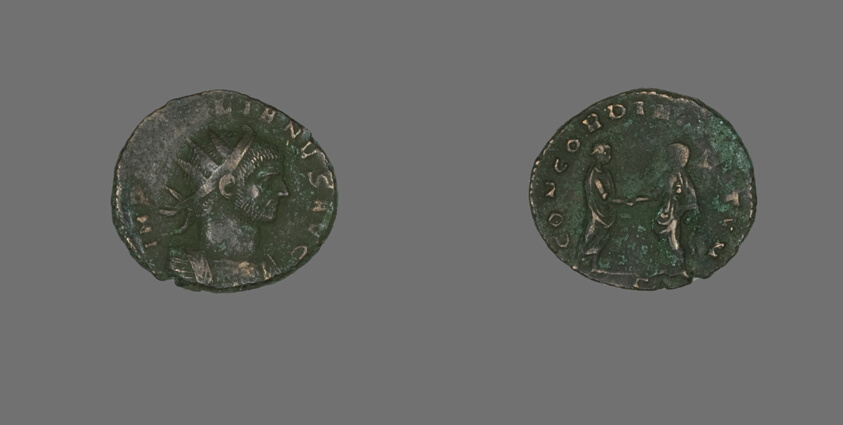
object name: Coin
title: Coin Portraying Emperor Aurelian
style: imperial (roman), ancient, roman (ancient, style or period)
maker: Roman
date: 270-275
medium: Bronze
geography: Roman Empire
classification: coin; struck; ancient art